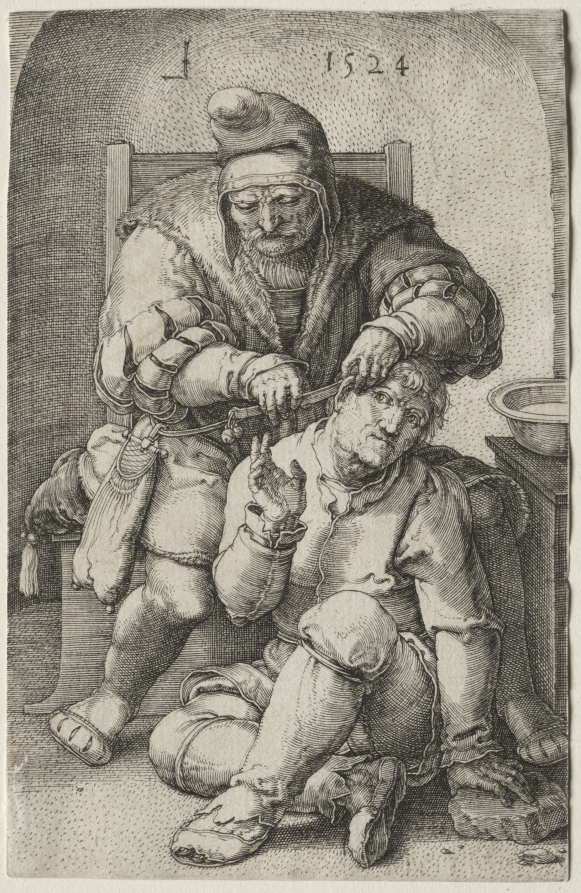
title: The Surgeon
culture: Netherlands, 16th century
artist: Lucas van Leyden (Netherlandish, 1494–about 1533)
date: 1524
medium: engraving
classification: Print